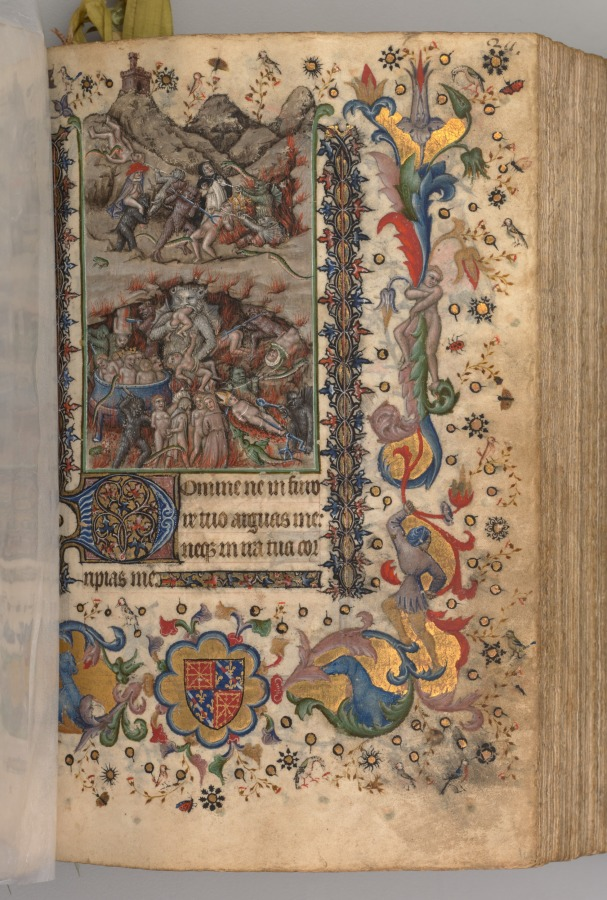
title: Hours of Charles the Noble, King of Navarre (1361-1425): fol. 101r, Text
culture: France, Paris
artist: Master of the Brussels Initials and Associates (French)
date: c. 1405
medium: ink, tempera, and gold on vellum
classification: Bound Volume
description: This precious volume was obviously highly prized by its owner, the French-born King of Navarre, who had his coat of arms painted on no less than twenty folios. Rather than directly commissioning this manuscript from a specific workshop, it seems that Charles the Noble acquired his book of hours -- perhaps ready-made for the luxury market -- while on a trip to Paris in 1404-05. A collaborative effort, six painting styles are evidenced within the pages of this codex, those of two Italians, two Frenchmen, and two Netherlanders. The painter who was responsible for the planning and decoration of the book, and who produced seventeen of the large miniatures, was a Bolognese artist known as the Master of the Brussels Initials. His principal assistant, responsible for most of the borders, was a Florentine who signed his name "Zecho" da Firenze on folio 208 verso.